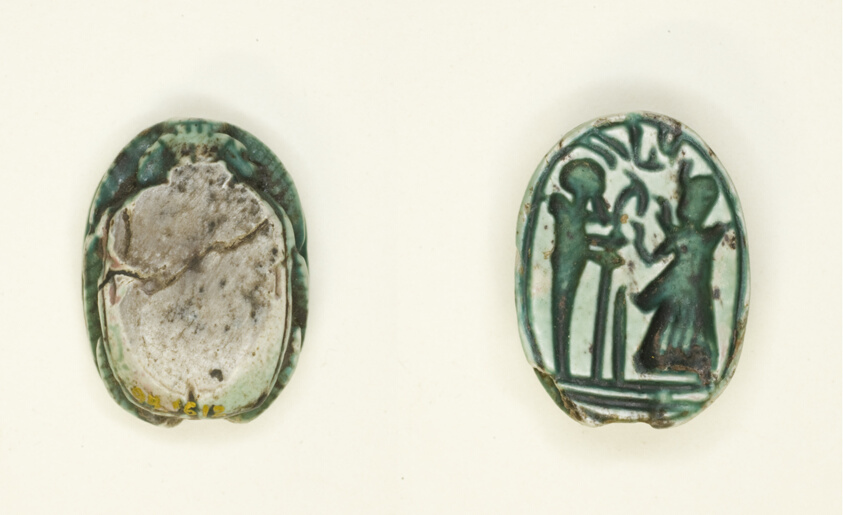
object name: Costume and Accessories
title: Scarab: The God Ptah with Name of Usermaatra Setepenra (Ramesses II)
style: new kingdom, egyptian, ancient, nineteenth dynasty, ramesside period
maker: Egyptian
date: New Kingdom, Dynasty 19, Reign of Ramesses II (about 1279–1213 BCE)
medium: Glazed steatite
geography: Egypt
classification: scarab; ancient art; costume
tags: pharaohs, deities, gods (deities), insects, kings, praying